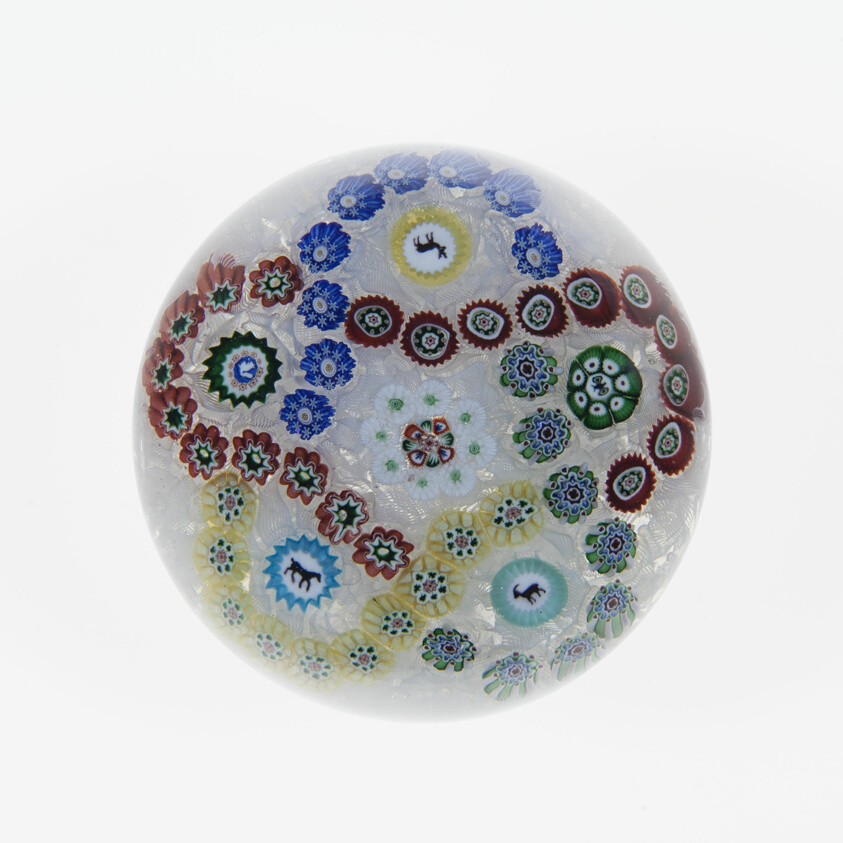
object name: Glass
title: Paperweight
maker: Baccarat Glassworks (Cristalleries de Baccarat); Lorraine, France, founded 1764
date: 19th century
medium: Glass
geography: Lunéville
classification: paperweight; millefiori; european decorative arts; glass